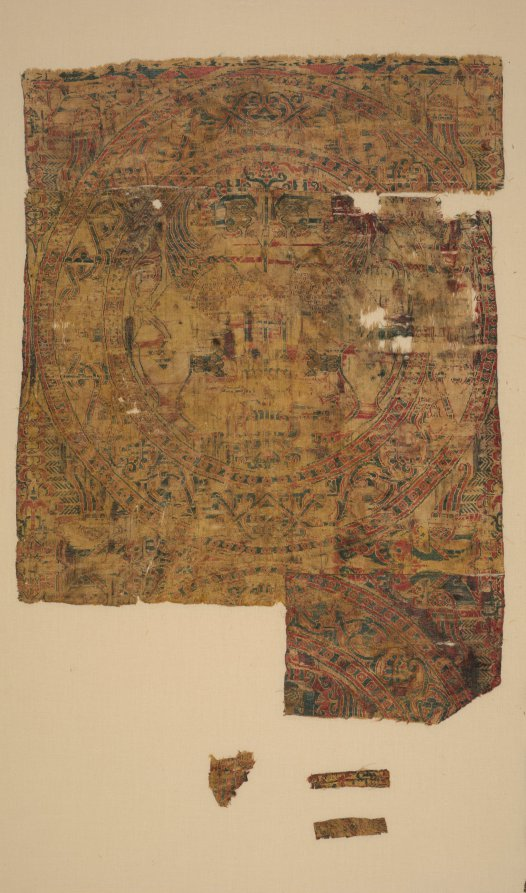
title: Fragment with confronted sphinxes in roundels from the tomb of Saint Bernard Calvo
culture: Spain, Almeria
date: 1200–43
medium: Silk and gold thread: lampas, taqueté, and plain-weave variant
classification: Textile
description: Composite creatures, such as winged lions and sphinxes, predate the rise of Islam in the Arabian Peninsula. Islamic textiles continued to include them for centuries after the Arab conquest of Spain. Pairs of lions with gold faces rear up to bite the haunches of the winged beasts. In between the roundels are pairs of peacocks, motifs traceable to pre-Islamic Persian art that spread throughout the Islamic world, including Spain. The body of Saint Bernard Calvo, the Catholic Bishop of Vich in 1233–43, was wrapped in textiles, including these fragments that still retain traces of his blood.